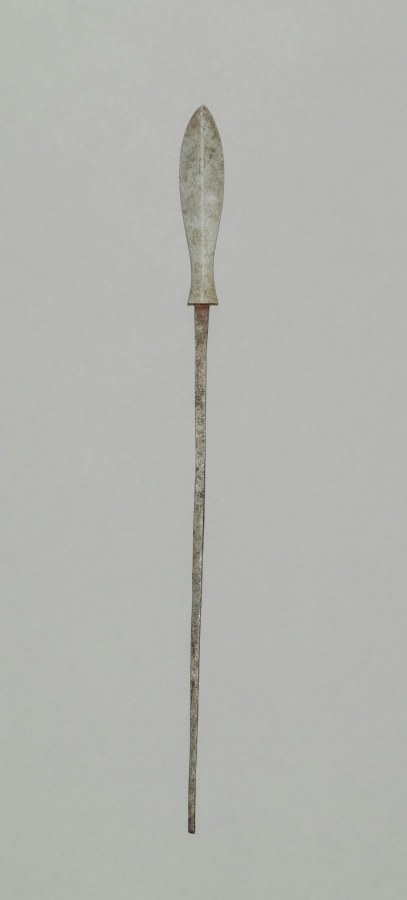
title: Arrow Point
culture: Japan, Edo period (1615–1868)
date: 1700s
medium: steel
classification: Arms and Armor